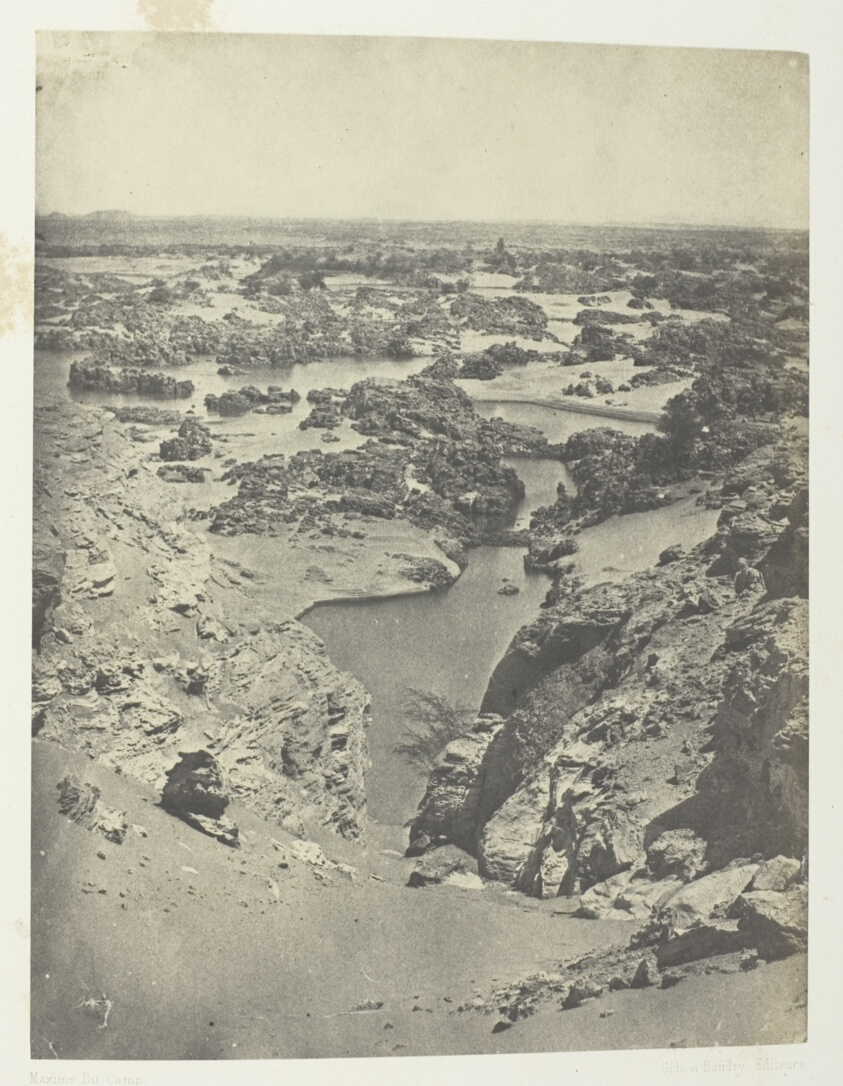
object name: Photograph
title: Vue Cavalière De La Seconde Cataracte; Nubie, plate 111 from the album "Egypte, Nubie, Palestine et Syrie" (1852)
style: 19th century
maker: Maxime Du Camp (French, 1822–1894)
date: 1849/51, printed 1852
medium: Salted paper print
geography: France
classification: salted paper print; photographic process; photography; photograph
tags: Collected by Hugh Edwards, Egypte, Nubie, Palestine et Syrie